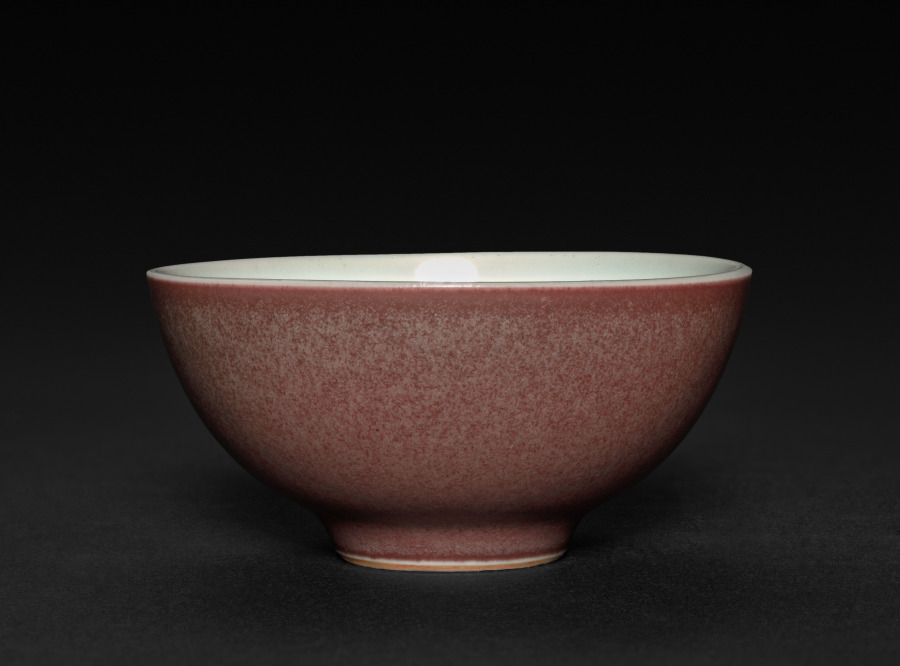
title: Cup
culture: China, Jiangxi province, Jingdezhen kilns, Qing dynasty (1644-1911)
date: 1700s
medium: porcelain with mottled blue glaze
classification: Ceramic